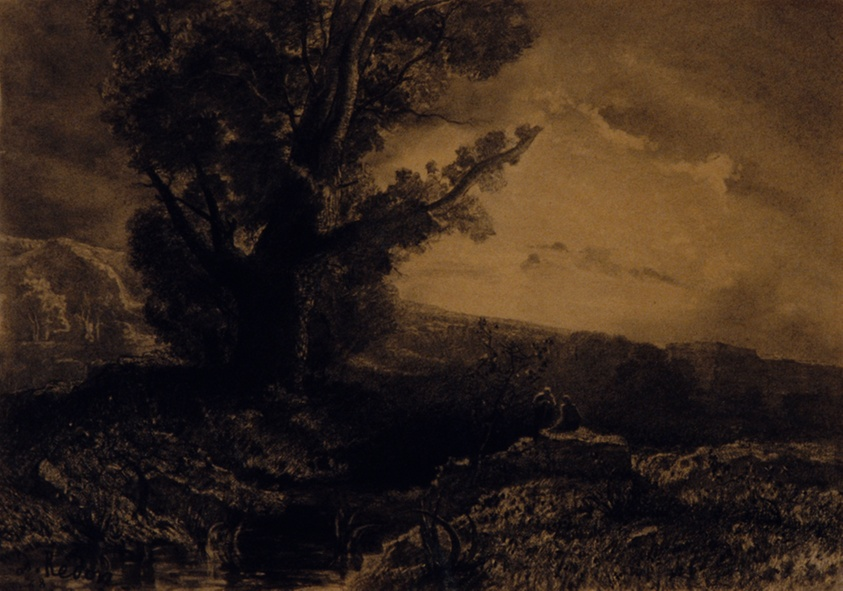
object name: Drawing and Watercolor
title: Landscape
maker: Odilon Redon (French, 1840-1916)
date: 1868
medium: Various charcoals, with black chalk and black Conté crayon, wiping, stumping and erasing on cream wove paper altered to a golden tone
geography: France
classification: charcoal; drawings (visual works); prints and drawing; paper